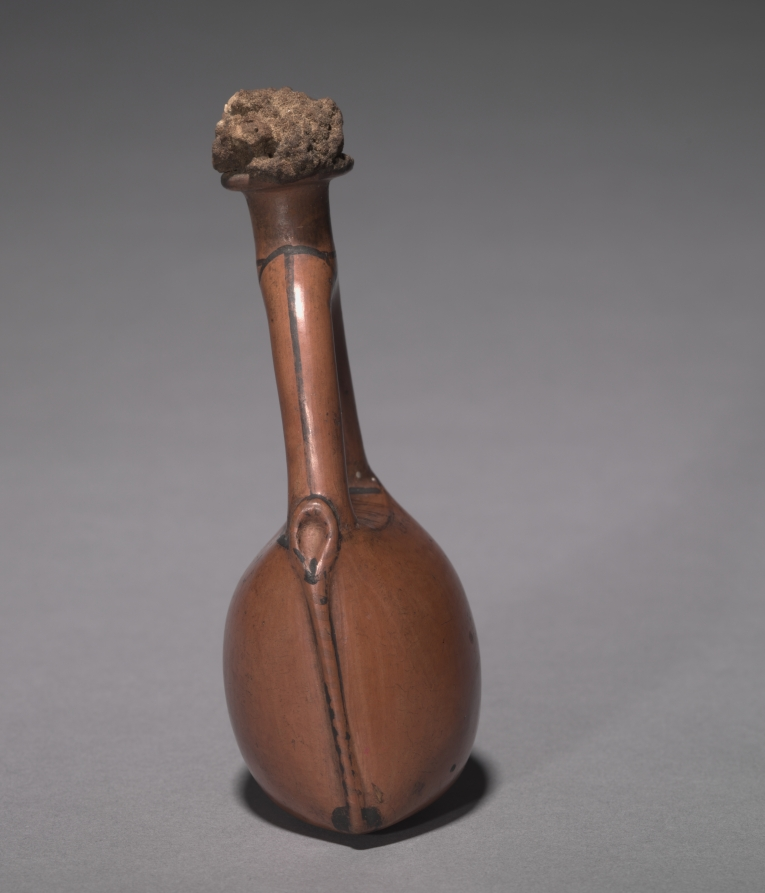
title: Flask in the Form of a Leather Bag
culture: Egypt, New Kingdom (1540–1069 BCE), Dynasty 18, reign of Tuthmosis III (1479–1425 BCE)–reign of Amenhotep III (1390–1352 BCE)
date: c. 1415–1381 BCE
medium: Nile silt ware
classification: Vessels